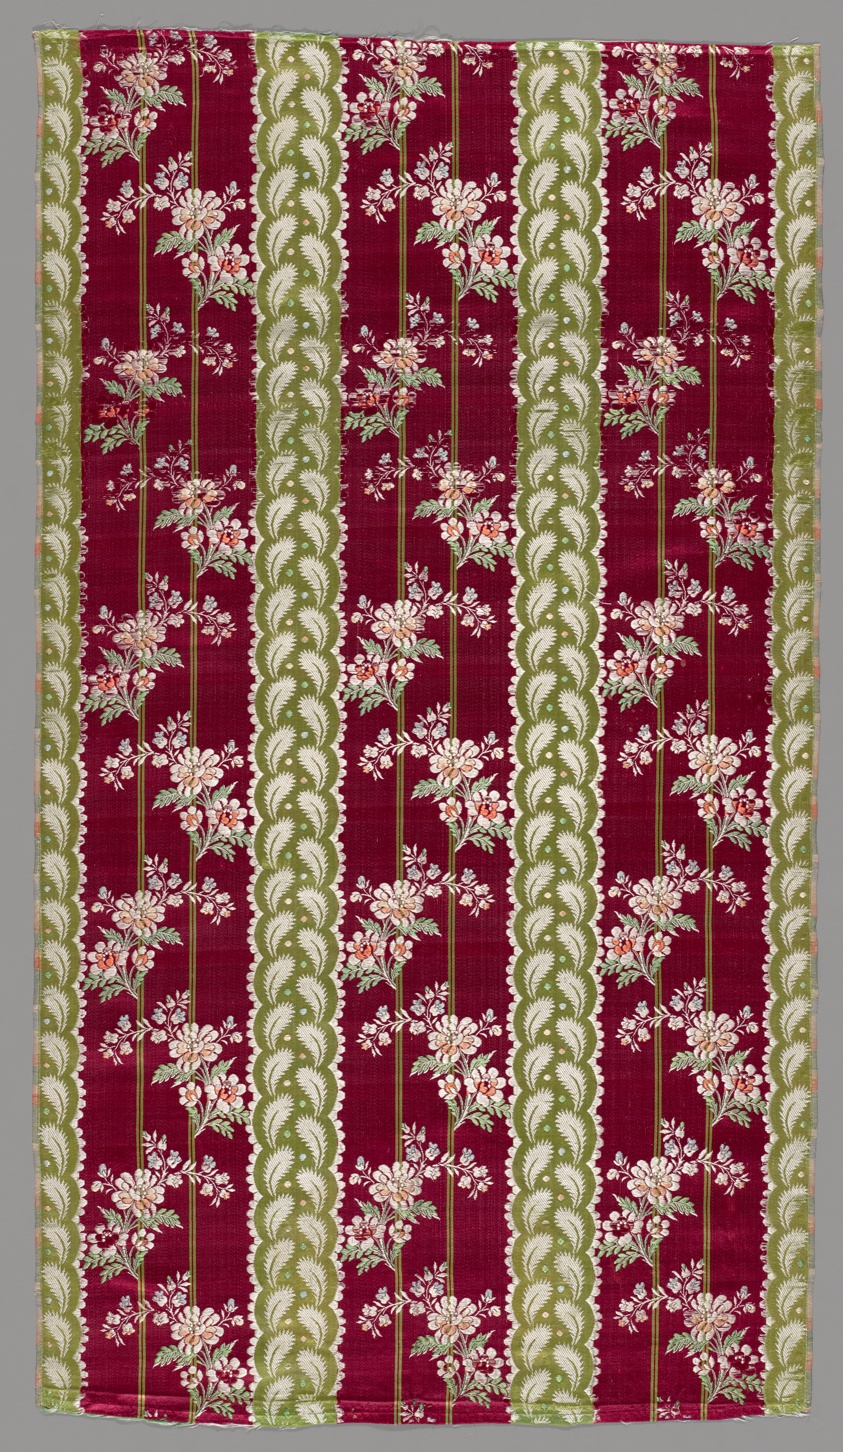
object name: Textile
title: Length of Woven Silk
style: 18th Century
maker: France, Lyon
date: 1770-75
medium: Silk, warp-float faced 9:1 satin weave self-patterned by ground wefts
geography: Lyon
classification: weaving; textile; silk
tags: flowers, botanical/floral, foliage, floral motifs, dots, lace, ribbon, stripes